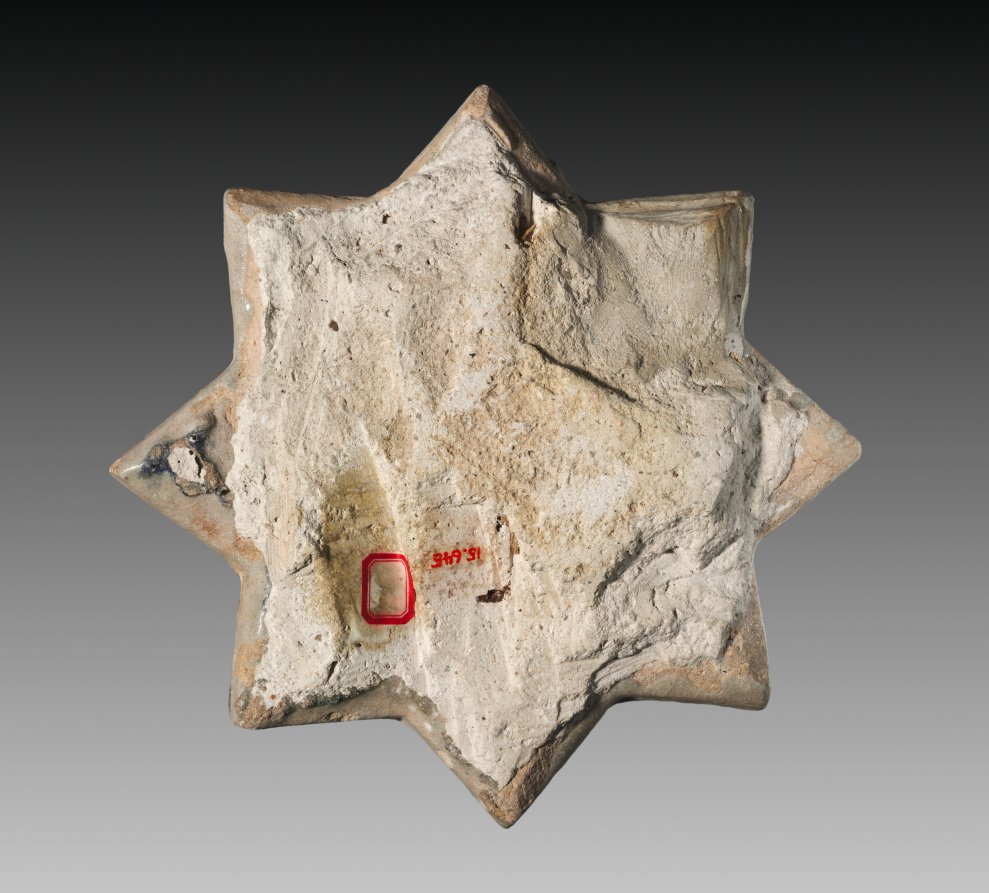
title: Wall Tile with Lotus Blossom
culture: Iran, probably Sultanabad, Ilkhanid period (1256–1353)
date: c. 1300–50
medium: fritware with molded and underglaze-painted design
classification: Ceramic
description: One popular method of covering large wall sections with ceramic decoration was to combine star-shaped tiles with cross-shaped tiles.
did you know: Some of the design relief has been molded as well as being built up in the white slip.